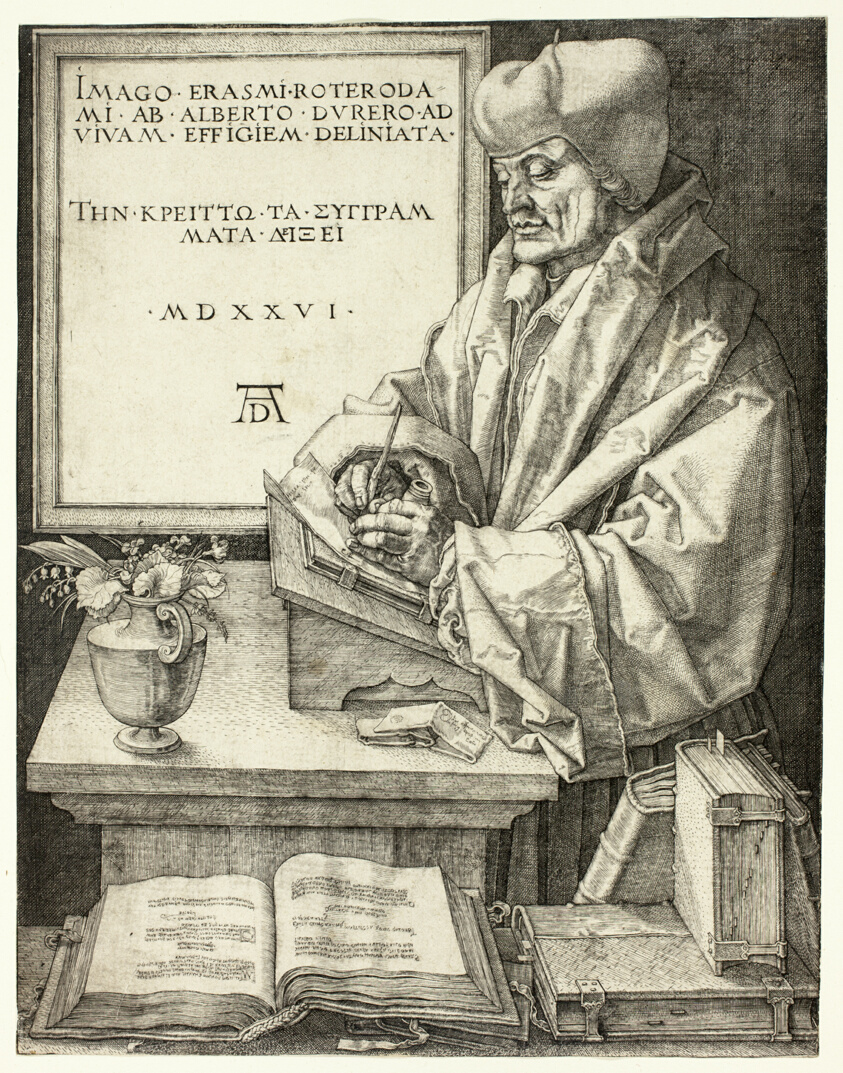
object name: Print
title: Erasmus of Rotterdam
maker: Albrecht Dürer (German, 1471-1528)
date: 1526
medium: Engraving in black on ivory laid paper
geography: Germany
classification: engraving; print; prints and drawing; paper